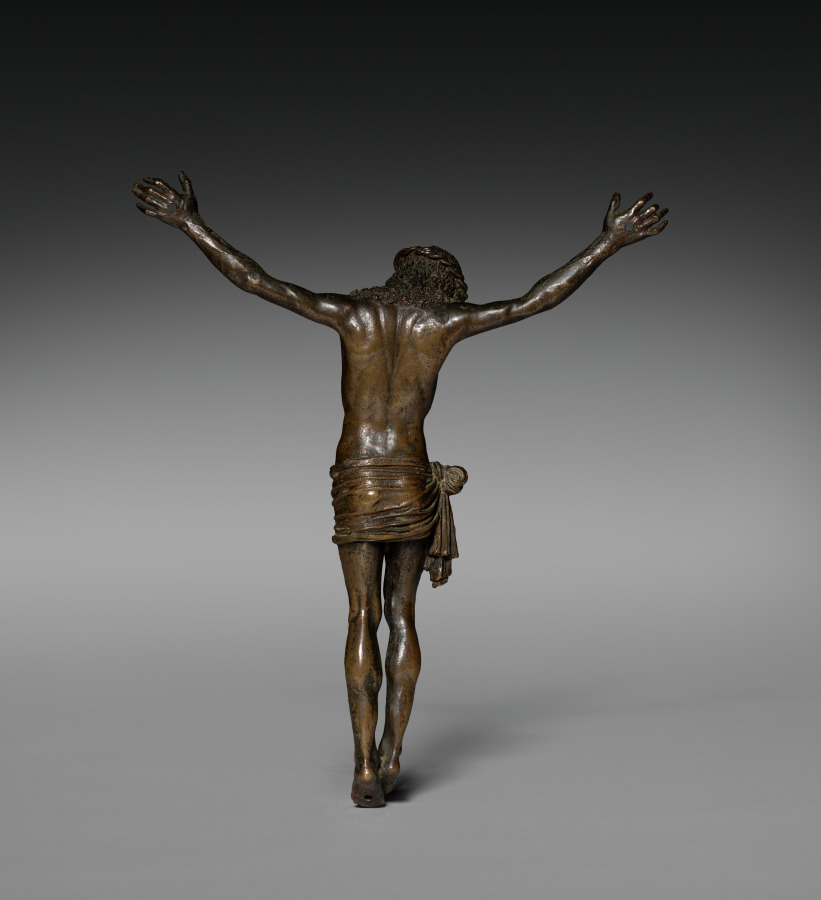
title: Crucified Christ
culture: Italy, Ravenna, 16th century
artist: Severo da Ravenna (Italian, c.1496–c.1543)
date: c. 1500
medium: bronze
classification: Sculpture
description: The highly finished surface of this sculpture, including the back, suggests it belonged to a refined collector. Small sculptures would often be held to admire details such as the strands of hair streaming onto Christ’s shoulders, the prominent veins in his forearms, and the intricate knotted cloth at his side.